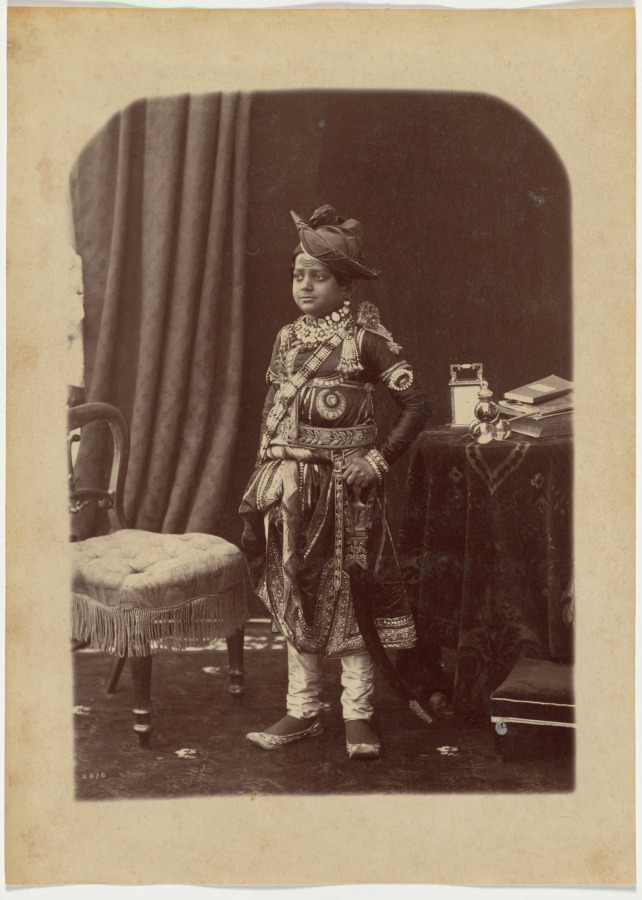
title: His Highness Maharaja Scindia of Gwalior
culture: India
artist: Raja Deen Dayal (Indian, 1844–1905)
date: 1887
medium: albumen print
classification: Photograph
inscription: Stamped in black ink on verso; “3.7.F” Imprinted in white in negative on recto: “2876”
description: Ten-year-old Madho Rao Scindia, the Maharaja of Gwalior (1876–1925; reigned 1886–1925), inherited the throne one year before this photograph was taken. Acceptance of both Indian and British cultural influences can be seen in the contrast of his garb, which is Indian from turban to shoe, with the Western-style furniture, clock, and books. Reflected in the glass balls on the table, which may be an inkwell or perfume jar, are the other people in the room during the shot. The person on the left in the top ball may be the photographer, Lala Deen Dayal.